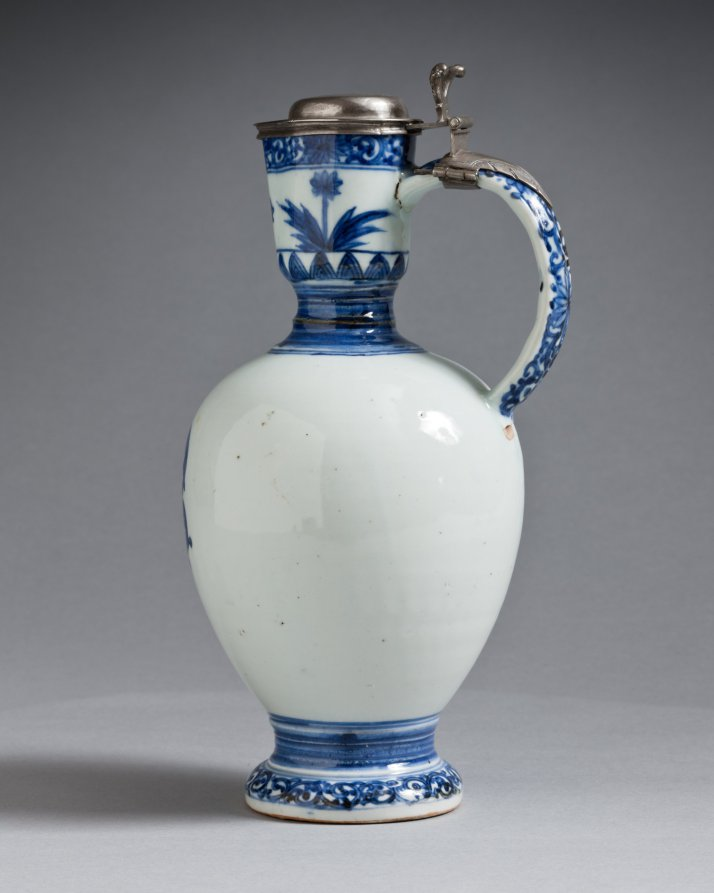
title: Jug with Silver Mounts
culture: Japan, Edo period (1615–1868)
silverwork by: Barent van Leeuwen (Dutch, 1637–1682)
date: c. 1662–76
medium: porcelain with underglaze blue decoration and silver mounts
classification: Ceramic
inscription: [on silver]: town mark for Amsterdam; lion rampant crowned (alloy mark for 0-934 silver); d (date letter for 1666), maker's mark of Barent van Leeuwen.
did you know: The coat of arms on this jug are those of the Valckenier family, active in the Dutch East India Company.